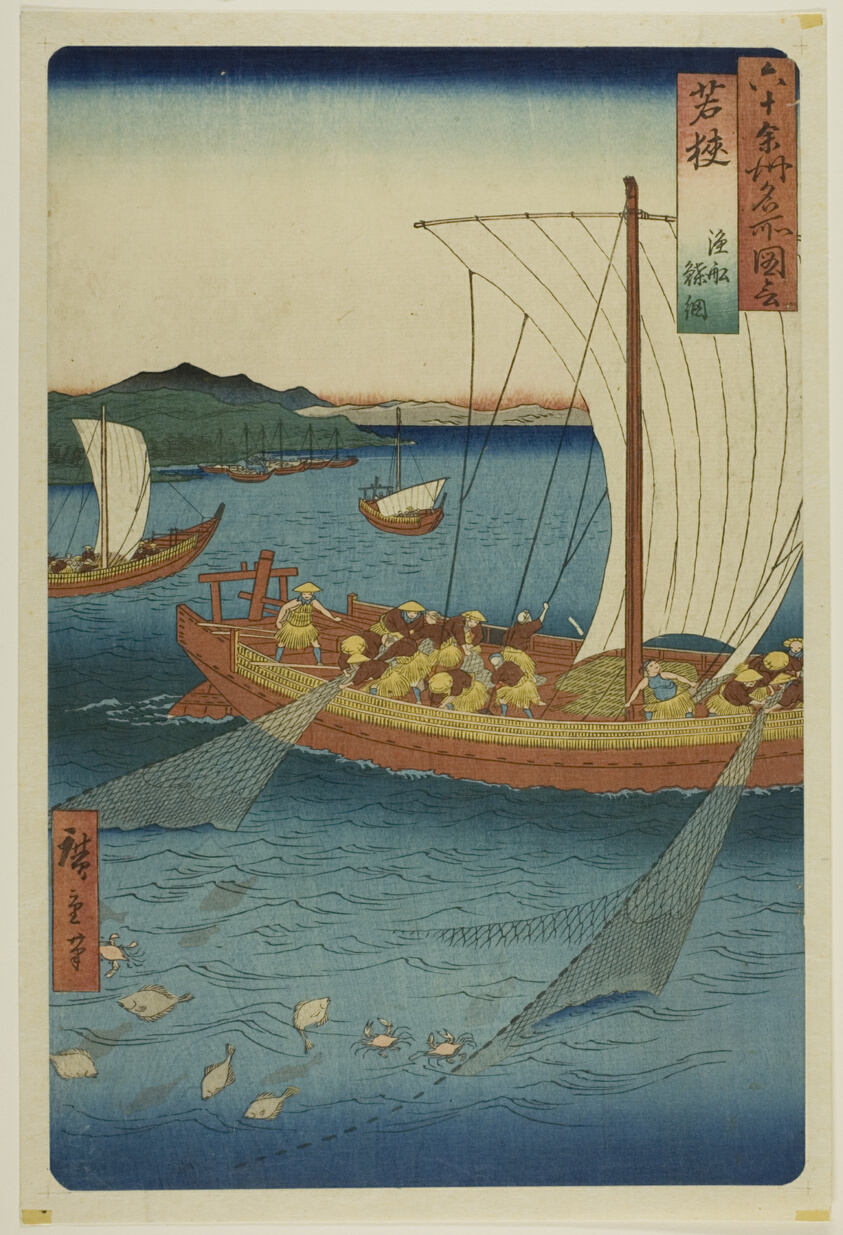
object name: Print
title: Wakasa Province: Fishing Boat Netting Flatfish (Wakasa, gyosen karei ami), from the series "Famous Places in the Sixty-odd Provinces (Rokujuyoshu meisho zue)"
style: Japanese (culture or style)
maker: Utagawa Hiroshige 歌川 広重; Japanese, 1797–1858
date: 1853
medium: Color woodblock print; oban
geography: Japan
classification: woodblock print; print